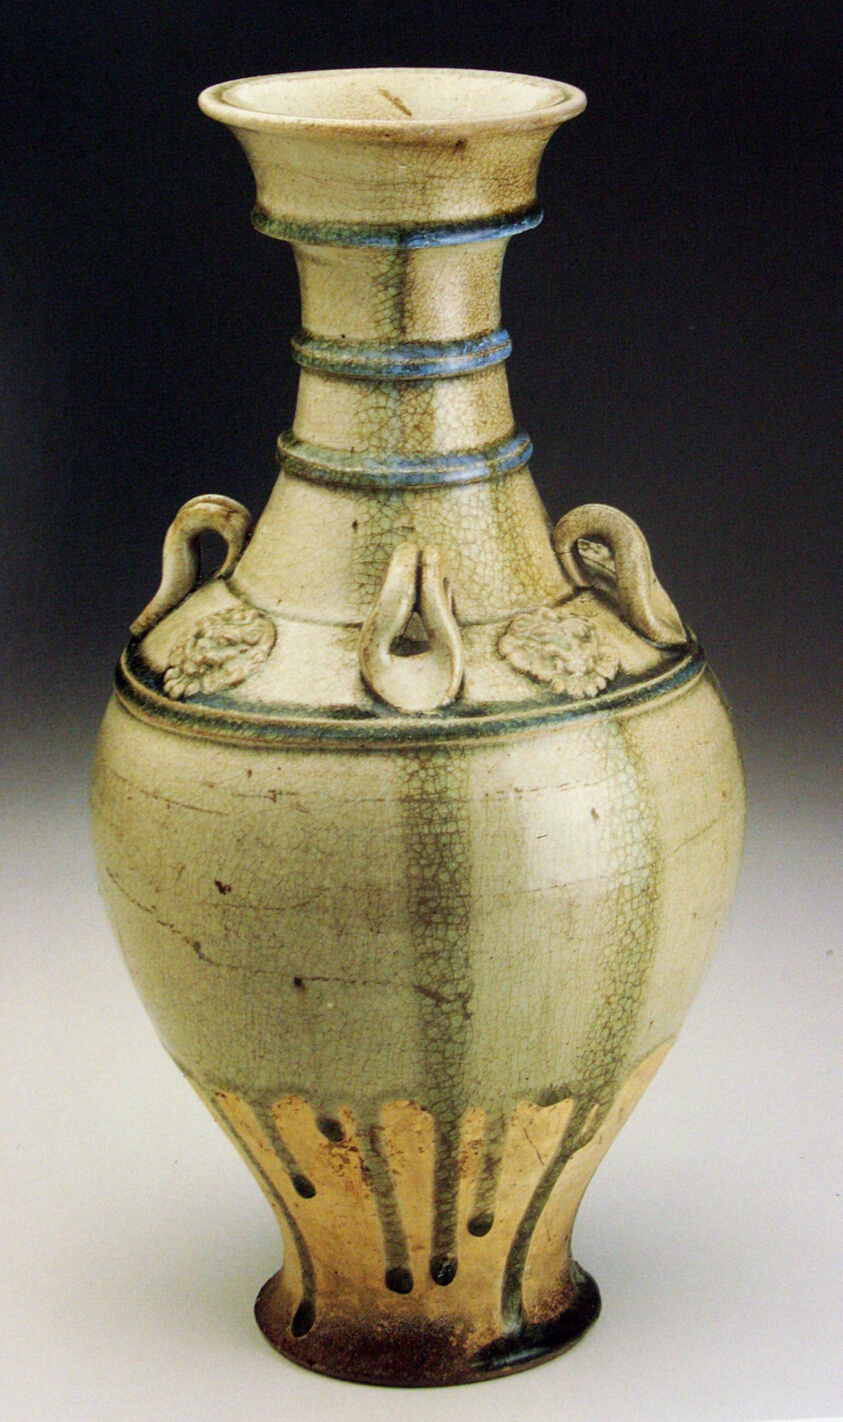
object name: Religious/Ritual Object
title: Vase (Hu) with Horizontal Bands, Loop Handles, and Lionlike Medallions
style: Chinese (culture or style)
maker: China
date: Sui dynasty (581–618)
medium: Stoneware with underglaze molded and applied decoration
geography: China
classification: vase; vessel; stoneware; ceramics; asian art; ritual objects